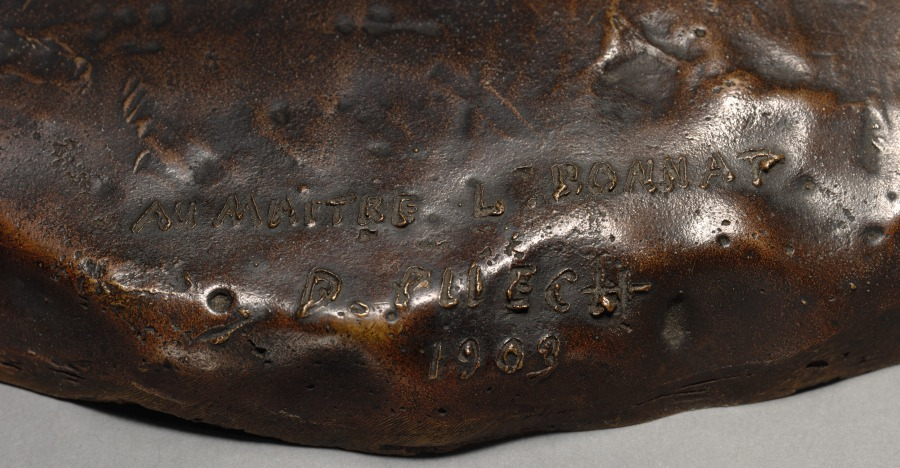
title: Standing Figure of Léon Bonnat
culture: France, 20th century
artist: Denys Pierre Puech (French, 1854–1942)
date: 1903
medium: bronze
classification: Sculpture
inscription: Signed and dated: "1903"; inscribed: "au maitre L. Bonnat"